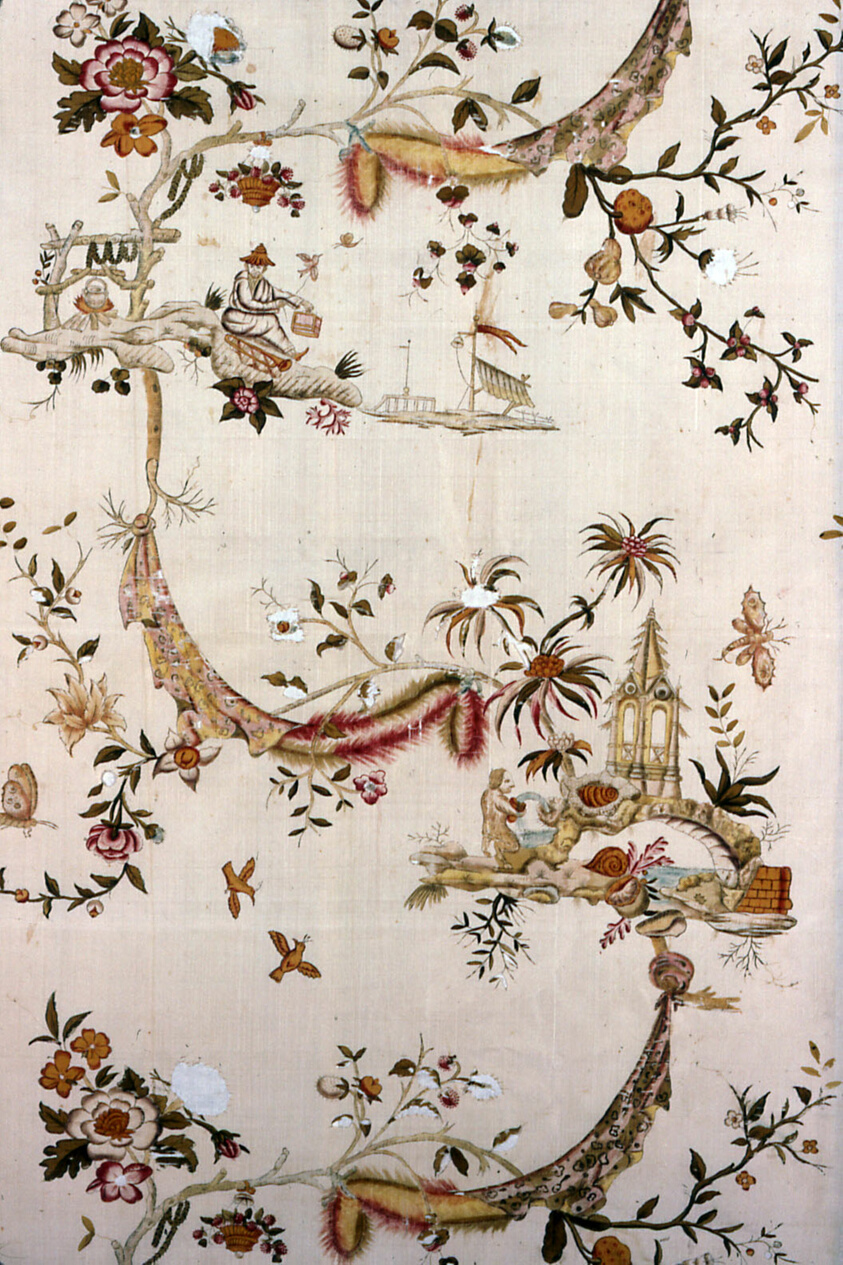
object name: Textile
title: Panel (Furnishing Fabric)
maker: France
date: after 1786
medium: Silk, plain weave; copperplate printed; painted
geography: France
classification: textile; weaving - printed; furnishing textile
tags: Floating Gardens